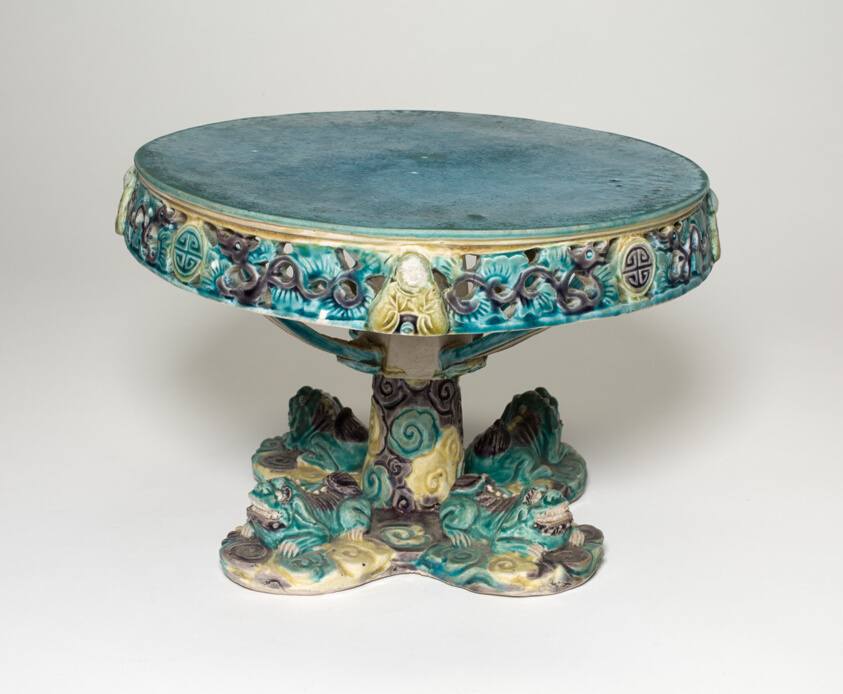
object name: Ceramics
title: Miniature Table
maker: China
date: Qing dynasty (1644-1911), 17th century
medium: Turntable in three colors with dragons, Buddhas, and Fu dogs.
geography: China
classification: ceramics; asian art